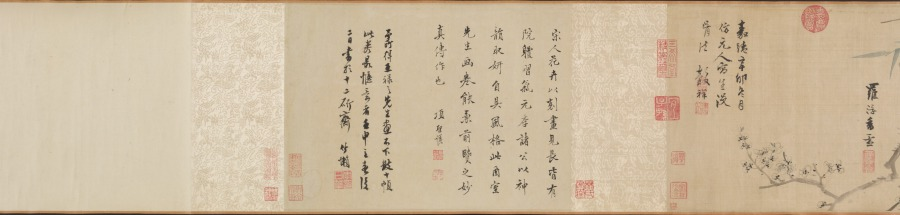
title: Flowers of Four Seasons, with Poems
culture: China, Ming dynasty (1368–1644)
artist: Wang Guxiang (Chinese, 1501–1568)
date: 1531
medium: handscroll; ink and light color on silk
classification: Painting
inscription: Artist's inscription, signature, and 15 seals. Ink Orchids. Sewn as pendants for the man of worth, swaying quiety, fragrance in the valley. [seal] Hsiao-chu ts'un Peony. Wiping his face, the young gentleman Ho [Ho Yen of Wei, Three Kingdoms] appears to have been powdered. His previous life was the perfume-stealing Han Shou [of Chin, 265–419 CE], the fragrance still lingers. [seal] Ts'un-wu chai. Flowering Crab Apple, New Bamboo. Shao-lin [Du Fu, 712–770] had to put down his brush. [Flowering Crab Apple]. Yü-k'o [Wen T'ung, d. 1079) in vain wrote poems about [Bamboo]. [seal] Yu-shih. Lotus Flowers. When she turns her head, half-hidden by a fan, and casts a glance, all the beautiful women become colorless. [seal] K'ang yüeh huai. Loquat. Ripeness in summer. [seal] Lu-chih. Pomegranate Flower. Whenever I remember you I will send my thoughts, but where have you gone--the [skirt] of pomegranate red? [seal] Wu-ho Sheng. Day Lily. Plant the day lily to forget sorrow. [seal] Yu-shih. Chrysanthemum. The untrammelled joy at the eastern fence. [seal] Lu-chih. Begonia. Comparing it to the beauties of Spring, and spreading them out as trimming for the stone steps. [seal] Yu-shih. Hibiscus. In recent years I have always enjoyed looking at flowers; instead of dark red I preferred pink ones. [seal] Jen-sheng i-lou. Narcissus, Camellia. The jade girdle left behind at Lo River. [Narcissus]. The precious pearls glitter before Spring. [Camellia]. [seal] Lu-chih. Heavenly Bamboo (Nandina domestica). A single branch in the wintry season. [seal] K'ang yüeh huai. Plum. Fragrant snow in the Lo-fou Mountains. [seal] Ts'un-wu chai. In the eleventh lunar month of the hsin-mao year of the Jiaqing era [1531], [I] imitated the boneless style of Yüan masters in sketching from life. Guxiang [seals] Yu-shih; Lu-chih. Translated by Wai-kam Ho/Lingyun Shih Liu (1980)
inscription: 2 colophons and 23 additional seals: 1 colophon dated 1632, and 2 seals of Li Jih-hua [Li Rihua] 李日華 (1565–1635); 1 colophon and 2 seals of Xiang Shengmo 項聖謨 (1597–1658); 3 seals of Liang Qingbiao 梁清標 (1620–1691); 6 seals of the Jiaqing 嘉慶 emperor (r. 1796–1820); 9 seals of Ch'eng Ch'i [Cheng Qi] 程琦 (1911–1988)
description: In this painting, flowers are loosely arranged by the seasons: narcissus and peony represent early spring; yellow loquat and lotus, summer; chrysanthemum, autumn; and the plum and evergreen bamboo, winter. The artist added to each flower a poetic line of calligraphy associating each plant with a historic or legendary figure. For example, the chrysanthemum, along with the line “The untrammeled joy at the eastern fence,” refers to the poet Tao Yuanming (died AD 427) who enjoyed chrysanthemums at the eastern fence in his garden. The scroll illustrates Wang Guxiang’s mastery of free brushwork, combining light monochrome ink with transparent colors. In his inscription, Wang says he used the “boneless” style without outlines as developed during the Yuan dynasty (1279–1368). Wang was a native of Changzhou, a city in southeast China known for its rich flora and fauna, and flower-and-bird painting tradition.